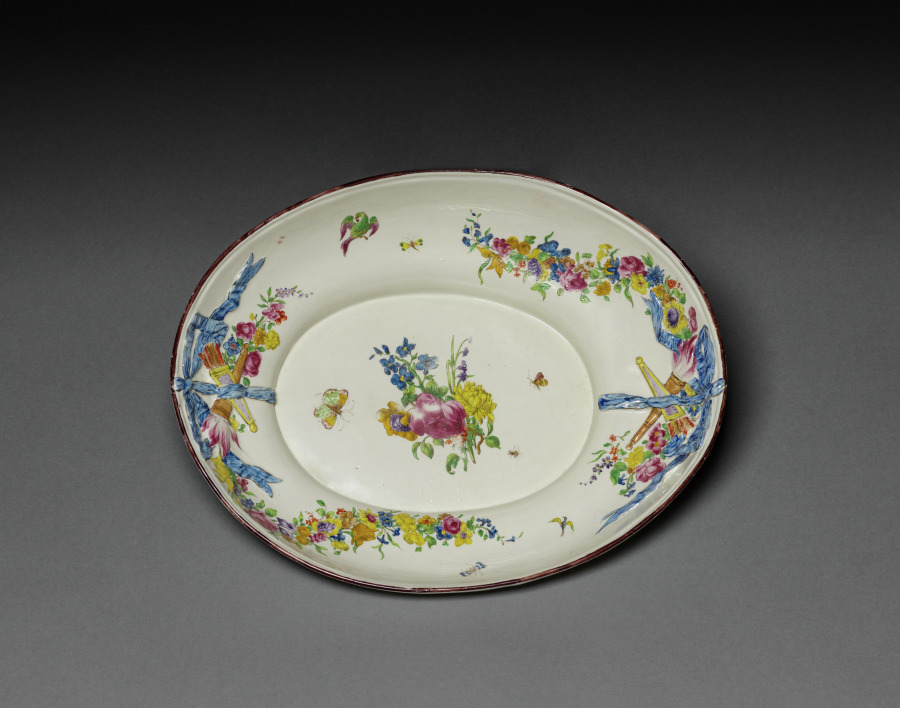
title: Basin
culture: France, Chantilly, 18th century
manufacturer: Chantilly Porcelain Factory (French)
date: c. 1770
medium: soft-paste porcelain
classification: Ceramic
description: On the basis of the style of its decoration, particularly the symbolic trophies of love derived from the repertoire of classic ornament, this ewer and basin can be dated c. 1770. At this period, the output of the Chantilly factory was largely restricted to comparatively utilitarian table wares; pieces such as these are quite rare.